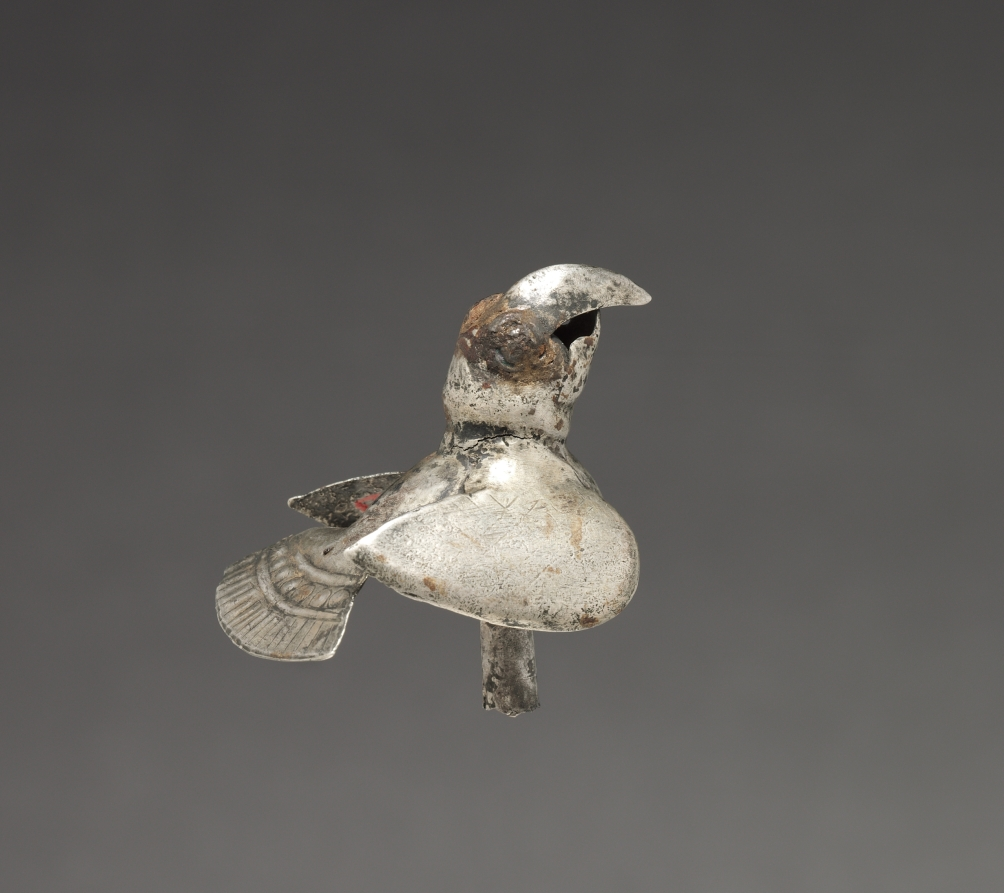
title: Macaw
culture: Peru, North Coast, Sicán or Chimú, 9th-15th Century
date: c. 800–1470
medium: gold alloy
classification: Metalwork